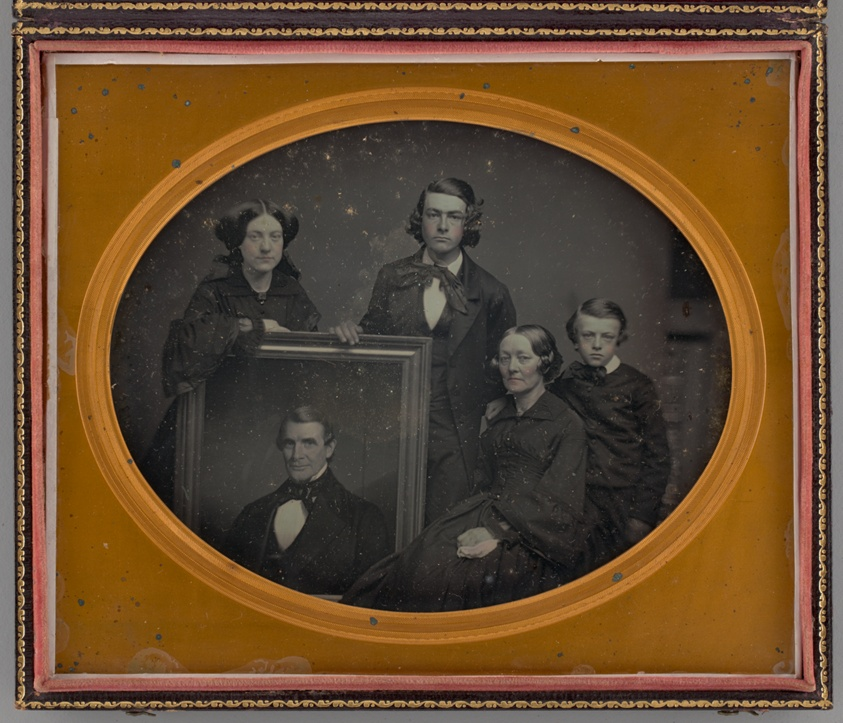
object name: Photograph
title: Untitled (The Coit Family)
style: 19th century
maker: S. L. Holman; American, 19th century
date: 1855/56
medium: Daguerreotype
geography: United States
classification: portrait; photograph; photographic process; photography; portrait; daguerreotype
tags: lundberg collection, portraits, families, family, portrait, portraits: multiple subjects